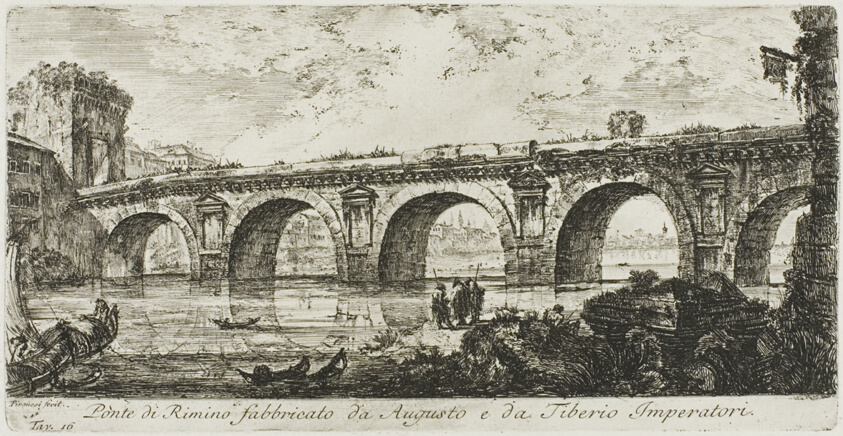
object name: Print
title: The Bridge at Rimini built by the Emperors Augustus and Tiberius, plate 16 from Some Views of Triumphal Arches and other monuments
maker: Giovanni Battista Piranesi (Italian, 1720-1778)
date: 1748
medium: Etching on ivory laid paper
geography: Italy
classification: etching; print; prints and drawing